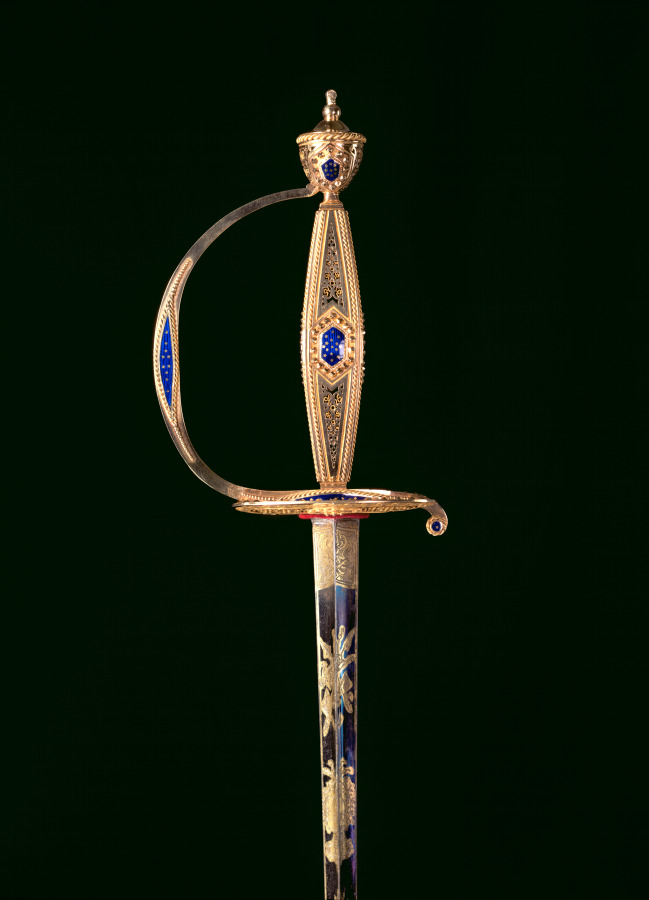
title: Small-Sword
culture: Switzerland, Geneva(?) (blade: Germany, Solingen, early 18th c.), late 18th Century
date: c. 1790–1800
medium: hilt: gold with blue translucent enamel; blade: etched, blued and gilded steel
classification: Arms and Armor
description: This example shows the small-sword at its latest and most refined stage of development. Though highly reflective of French taste, it was probably fashioned in a Swiss workshop under French influence or by a French craftsman working in Switzerland. Worn publicly as an emblem of social rank, this sword was likely custom-made for an affluent individual to use on formal or court occasions. So-called because of its short blade, the small-sword emerged as the light and quick weapon of choice for aristocratic civilians during the 1700s. Such a sword was traditionally suspended at about mid-thigh from the left side of a belt, the hilt exposed through the opening of the gentleman's coat. Highly visible, the hilt invited lavish decoration through precious materials such as gold and enamels, as seen here. Considered a type of masculine jewelry at that time, small-swords featured a variety of hilt styles that went in and out of fashion. Many were decorated to match personal costume, and jewelers worked on the finest small-swords of the day.